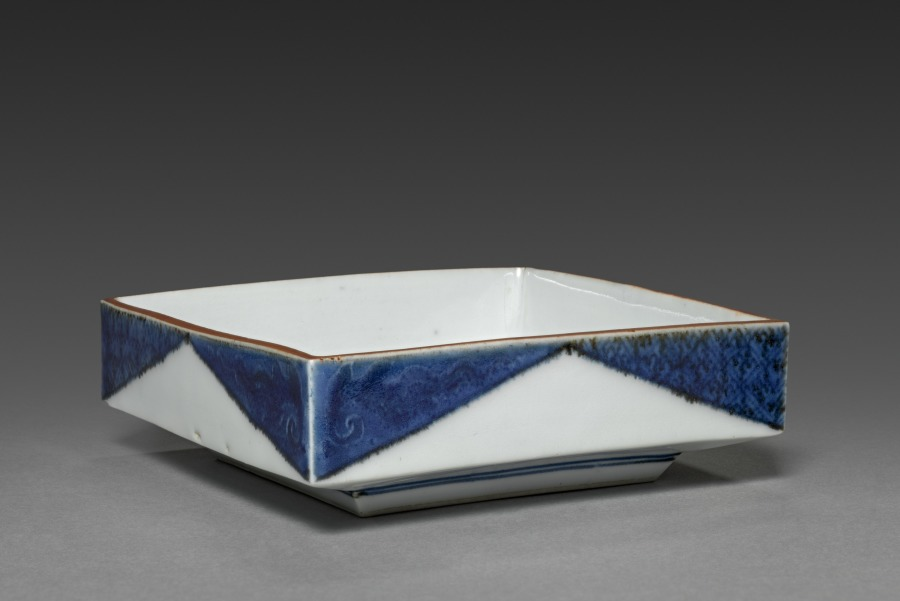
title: Side-Dish with Dandelion in Rocks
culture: Japan, Edo period (1615–1868)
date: 1700s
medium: One of a set of five dishes; porcelain with underglaze blue and overglaze iron oxide (Arita ware, Kutani style)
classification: Ceramic